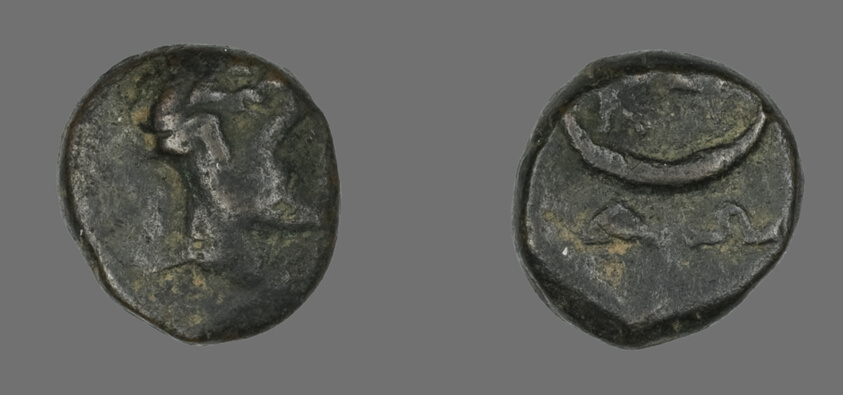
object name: Coin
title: Coin Depicting the God Dionysos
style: greek, ancient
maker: Greek; Cydonia, Crete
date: late 3rd century BCE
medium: Silver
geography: Ancient Greece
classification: coin; ancient art